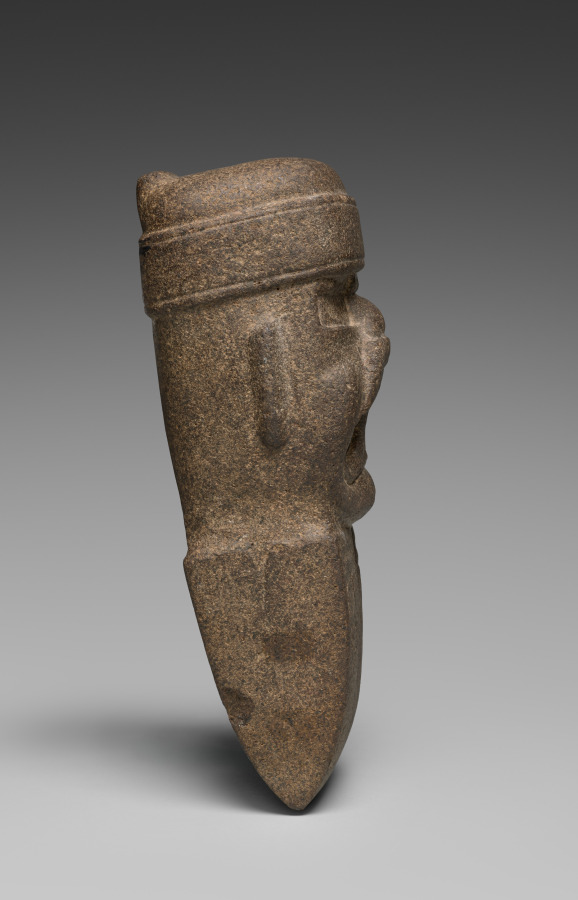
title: Celt with Deity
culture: Mesoamerica, Mexico, Olmec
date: 1000–300 BCE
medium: stone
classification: Sculpture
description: This ceremonial object has the head of a deity and a body shaped like an axe blade (celt) used to clear land for agriculture. The flared mouth, toothless gums, and fangs are typical of Olmec supernatural beings. The meaning of the body's "four-dots-and-a-bar" motif is unclear, but it sometimes appears in depictions of plants. The deity, then, seems to be associated with fertility.